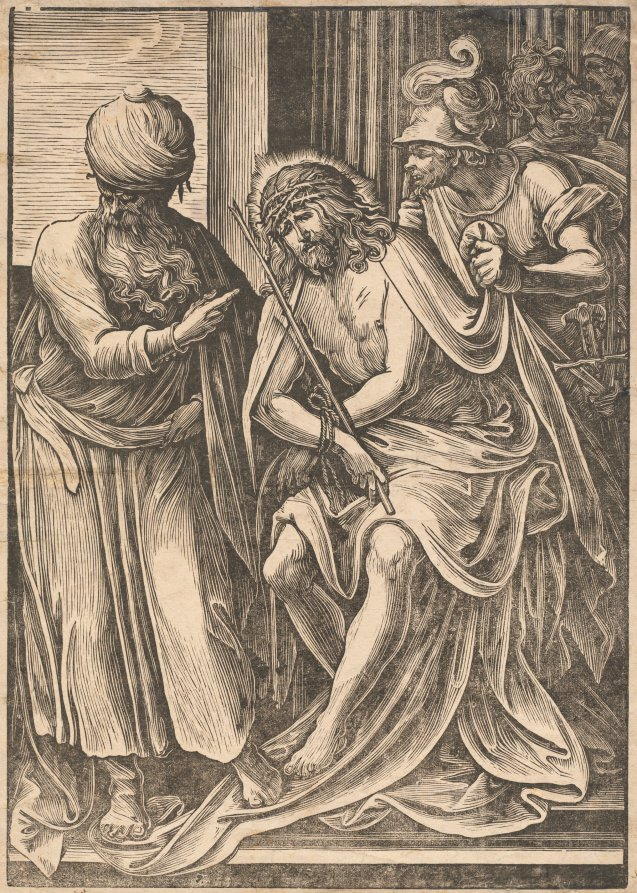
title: Ecce Homo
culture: Italy, late 16th-early 17th century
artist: Giuseppe Scolari (Italian)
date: late 1500s-early 1600s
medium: woodcut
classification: Print